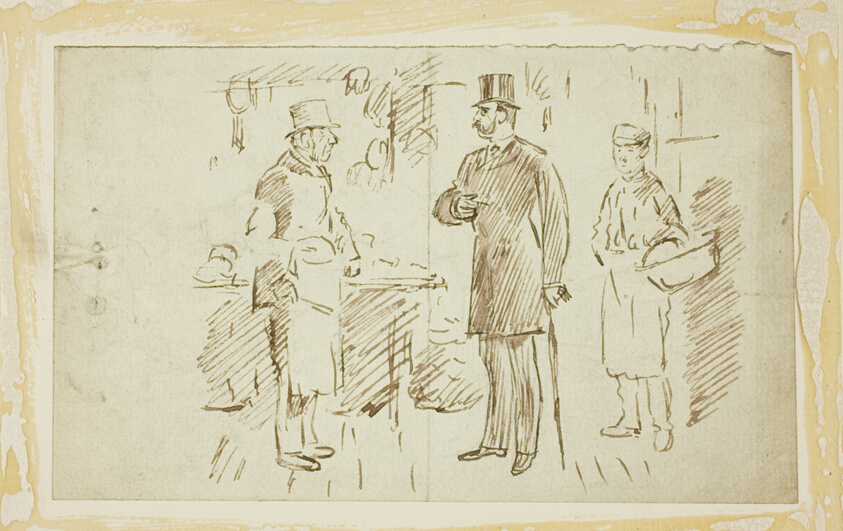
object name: Drawing and Watercolor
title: Gent in Tall Hat Addressing Butcher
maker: Charles Samuel Keene (British, 1823-1891)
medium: Pen and brown ink, with brush and brown wash, over traces of black chalk, on gray laid paper, laid down on ivory wove card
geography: England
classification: pen and ink drawings; drawings (visual works); prints and drawing